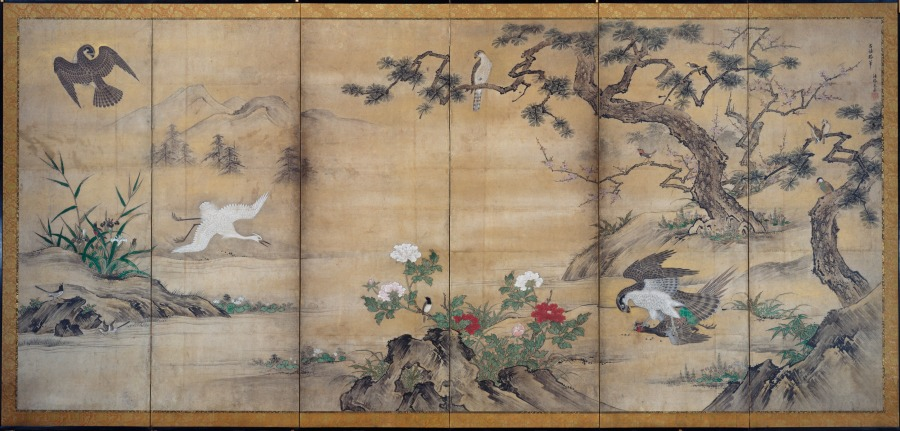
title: Birds and Flowers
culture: Japan, Momoyama period (1573–1615)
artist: attributed to Kano Mitsunobu (Japanese, 1565–1608)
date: late 1500s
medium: One of a pair of six-panel folding screens; ink, color, and gold on paper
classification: Painting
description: The landscape depicted in this pair of screens follows a seasonal progression from right to left, starting with the blossoming plum of early spring and ending with late autumn peonies. A variety of smaller birds are positioned throughout the scene, and a trio of swimming ducks is bracketed by early summer irises and early autumn bellflowers at the center. While some raptors (birds of prey) terrorize a pheasant and an egret (a waterfowl) to the right, a peacock and peahen converse to the left. Hawks are associated with military prowess, while the peafowl suggest cultural prestige.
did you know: As masters of the Kano academic painting style, both Kano Shōei and Kano Mitsunobu favored Chinese-inspired subject matter, such as birds and flowers.